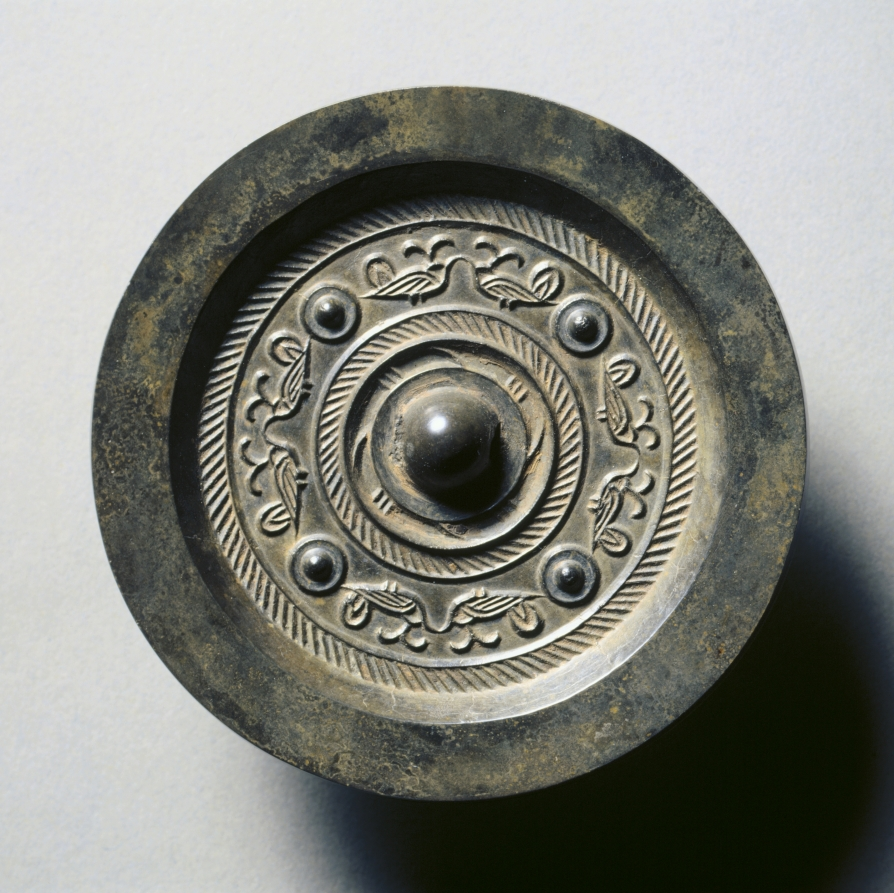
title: Mirror with Four Nipples and Eight Birds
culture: China, Western Han dynasty (206 BCE–8 CE)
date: 100–1 BCE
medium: bronze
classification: Metalwork